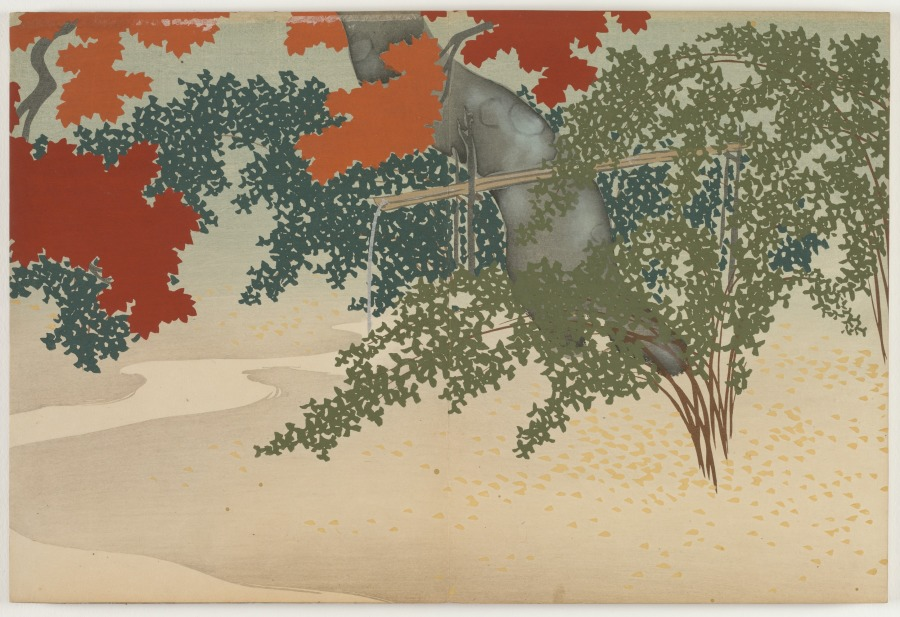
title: Flowers of a Hundred Worlds (Momoyogusa): Late Autumn (Boshu)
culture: Japan, Meiji period (1868–1912)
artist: Kamisaka Sekka (Japanese, 1866–1942)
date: 1909–10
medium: color woodcuts with gold and silver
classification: Bound Volume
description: These deluxe albums, enhanced with gold and silver, reproduce the work of Kamizaka Sekka, who emulated the decorative style of painter Ogata Korin and his successors.